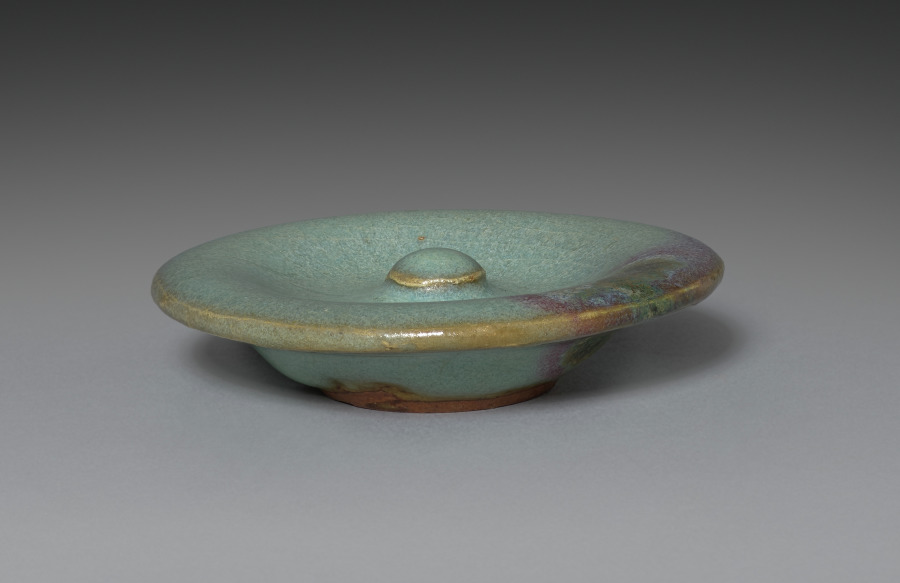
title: Jar with Cover (cover)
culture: China, Henan province, Yuxian, Northern Song dynasty (960-1127) or Jin dynasty (1115-1234)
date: 1100s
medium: porcelaneous stoneware with blue glaze and splashes of purple, Jun ware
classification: Ceramic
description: The beauty of Jun ware lies in its spectacular glaze effects, which provide immediate visual appeal. The glaze that is thickly applied onto the heavily potted body also lends the vessel a sense of volume. As shown here, its glaze colors range from soft milky-blue to rose-purple. The purple suffusions are created by splashing or brushing copper-rich pigments onto the glaze before firing. The merging of purple splashes with opalescent blue glaze displays rich tonal variations, resembling purplish glows at sunset.